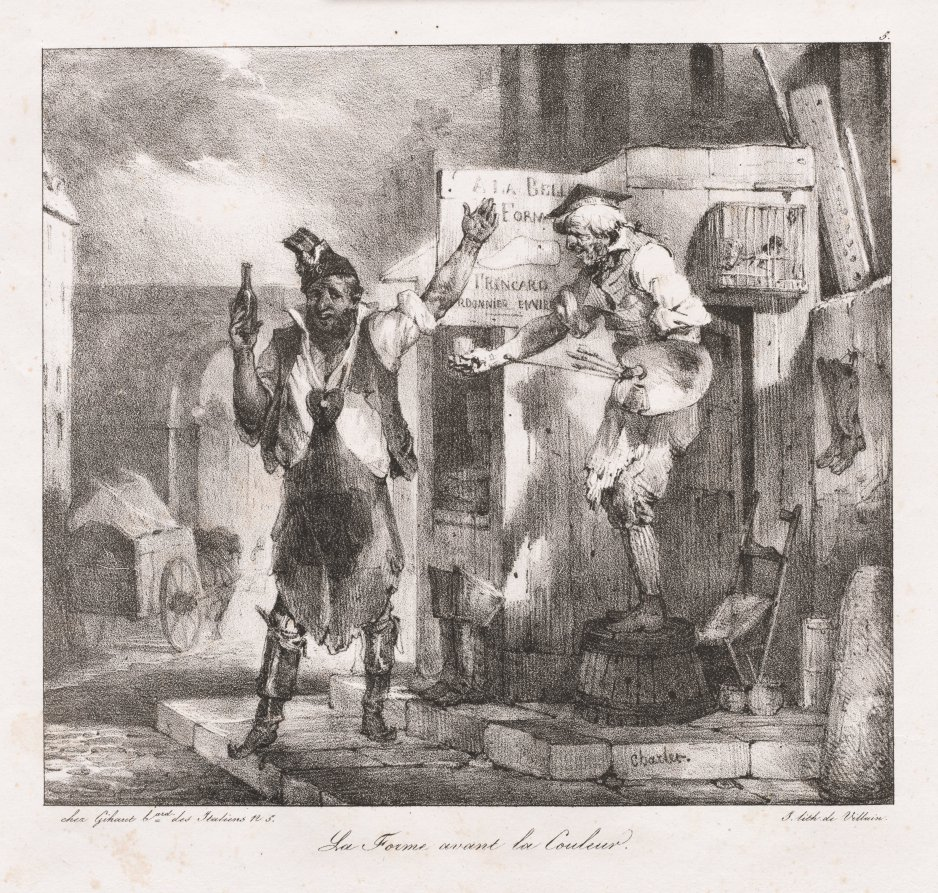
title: Lithographic Sketches by Charlet: Form before Color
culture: France, 19th century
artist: Nicolas Toussaint Charlet (French, 1792–1845)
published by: Villain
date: 1823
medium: lithograph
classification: Print